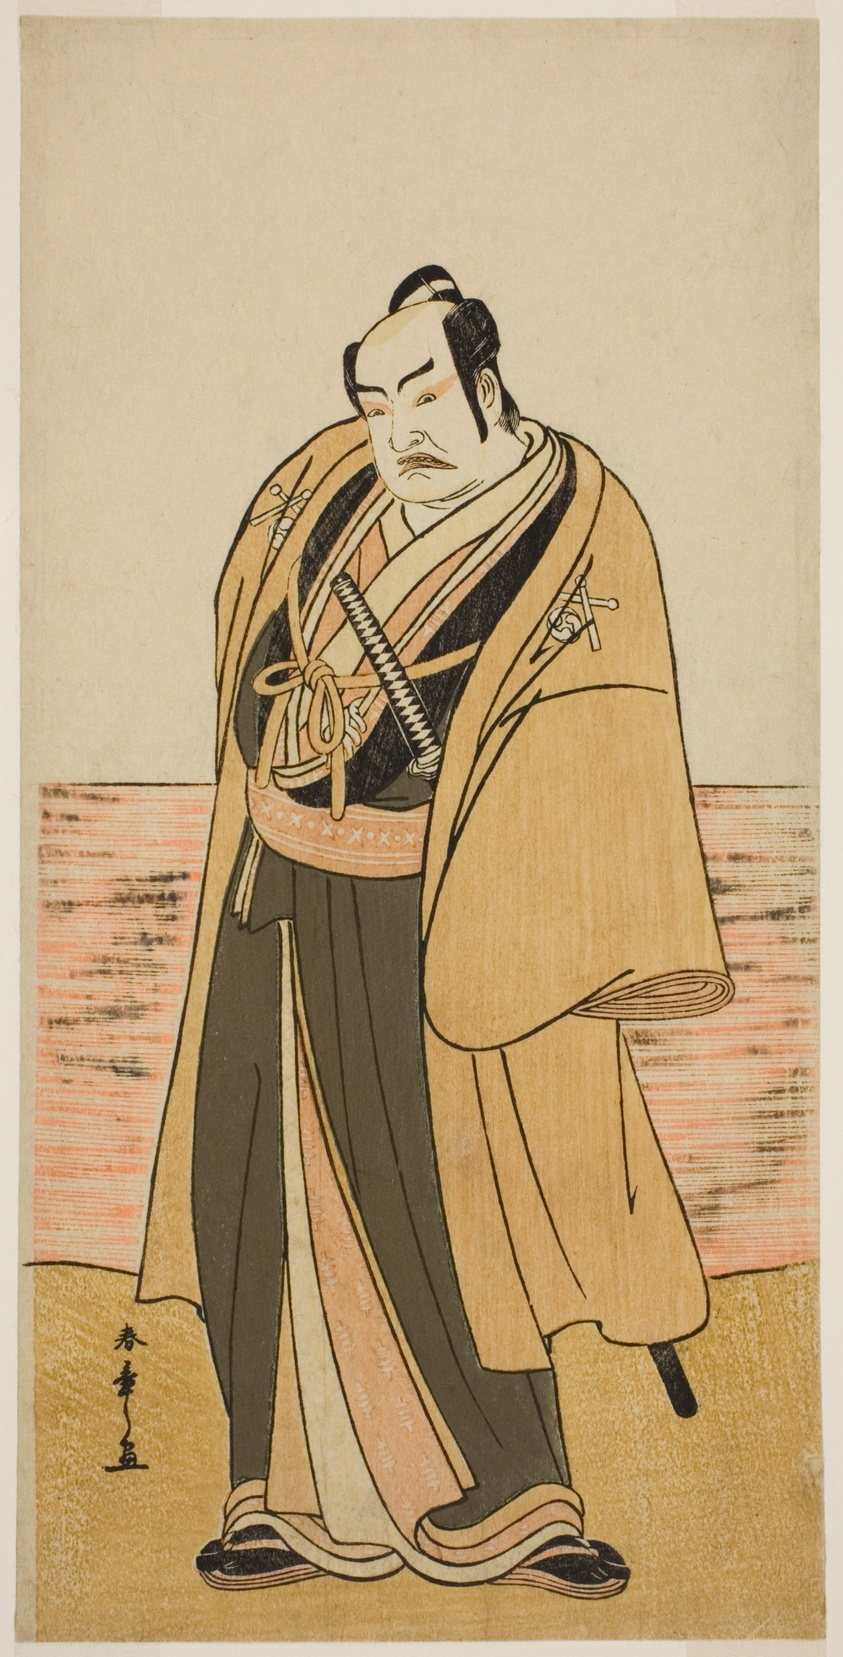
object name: Print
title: The Actor Nakamura Sukegoro II as Kaminari Shokuro in the Play Hatsumombi Kuruwa Soga, Performed at the Nakamura Theater in the Second Month, 1780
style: Japanese (culture or style)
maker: Katsukawa Shunsho 勝川 春章; Japanese, 1726-1792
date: c. 1780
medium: Color woodblock print; hosoban; one sheet of pentaptych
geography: Japan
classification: woodblock print; print; asian art